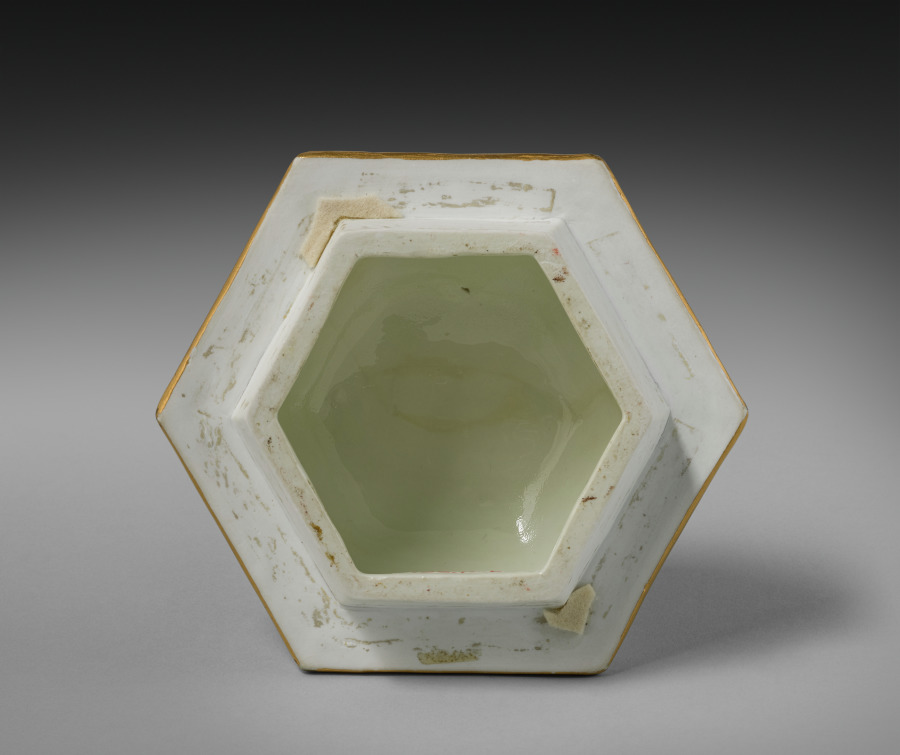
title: Cover for a Vase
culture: Germany, Meissen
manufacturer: Meissen Porcelain Factory (German, est. c. 1710)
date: c. 1728–30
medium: porcelain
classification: Ceramic